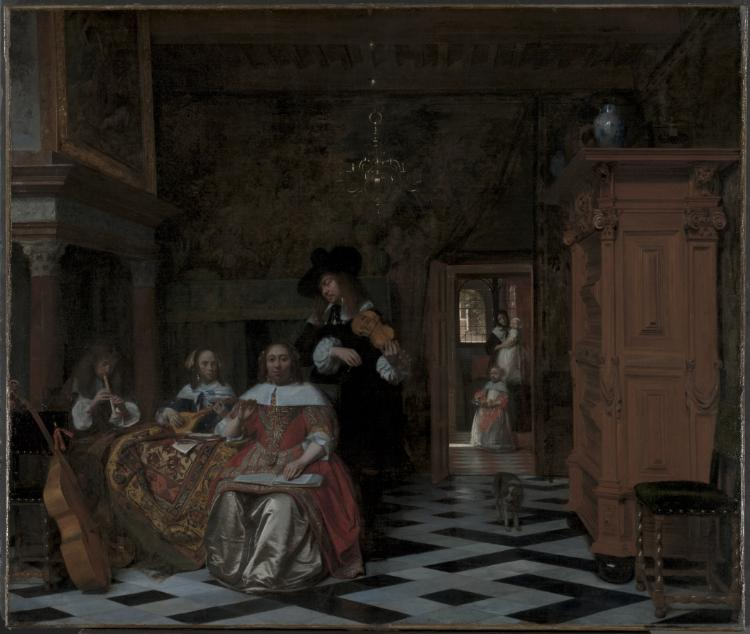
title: Portrait of a Family Playing Music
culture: Netherlands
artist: Pieter de Hooch (Dutch, 1629–1684)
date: 1663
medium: oil on canvas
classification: Painting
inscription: Signed lower left: "P D HOOCH/ 63"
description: The identity of the sitters remains unknown, although the marble floor and mantelpiece, the Transylvanian prayer rug on the table, and the silk clothes all point to the family’s considerable wealth. Furthermore, the richly carved chest at the right supports Chinese vases and Japanese lacquered boxes, a reference to the flourishing Dutch trade with Asia. Music making often took place at home, and its appearance here also signifies the harmoniousness of the family.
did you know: During this period, the Dutch Republic was the richest, most urbanized nation.